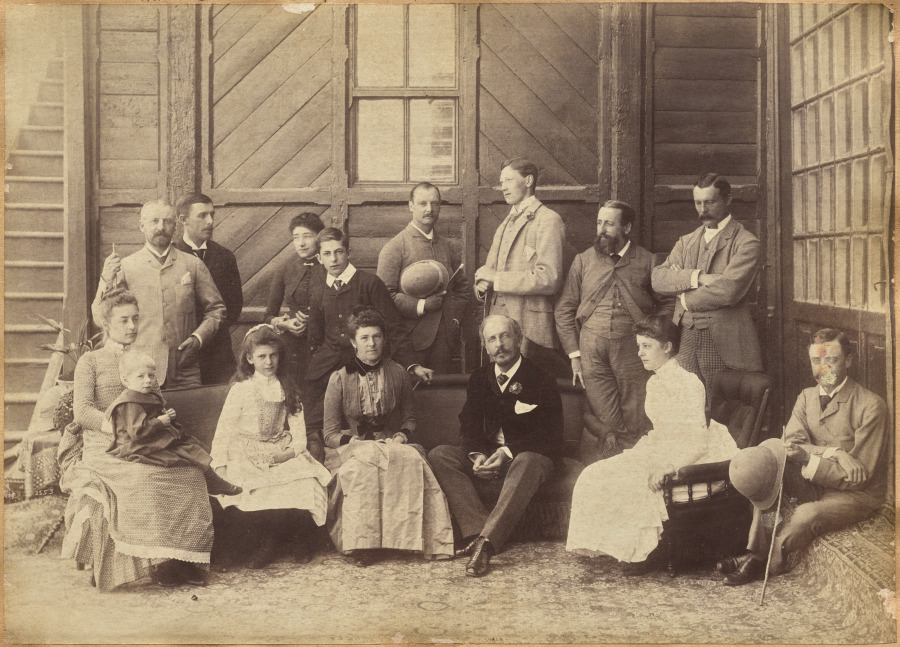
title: Shimla 17th May 1887: Viceregal party. Lord William Beresford, Military Secretary, Captain Leonard Gordon A.D.C., Mademoiselle Clerc, The Honorable Basit Blackwood, Major F. R. Hamilton A.D.C., Mr. Oglivie Grant, Sir Donald Mackenzie Wallace K.C.E., Private Secretary, Dr. J. Findlay, Mrs. F. R. Hamilton, Master G. Hamilton, Lady Victoria Blackwood, H. E. The Countess of Dufferin, H. E. The Earl of Dufferin, Lady Hermione Blackwood, Lord Herbrand Russell, A.D.C. (recto)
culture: India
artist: Raja Deen Dayal (Indian, 1844–1905)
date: 1887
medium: albumen print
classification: Photograph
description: These photographs are part of an album, now disassembled, of around 105 photographs taken in India between 1885 and summer 1887 that provide glimpses into the lives of the British colonial elite and royal and upper-class Indians. The museum holds another group of 37 pictures from this album (2016.266), which was probably commissioned by a British civil servant visiting or working in India around 1888 as a personal souvenir of his experiences there.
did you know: Raja Deen Dayal is regarded now, and was considered during his lifetime, to be India’s most important 19th-century photographer.